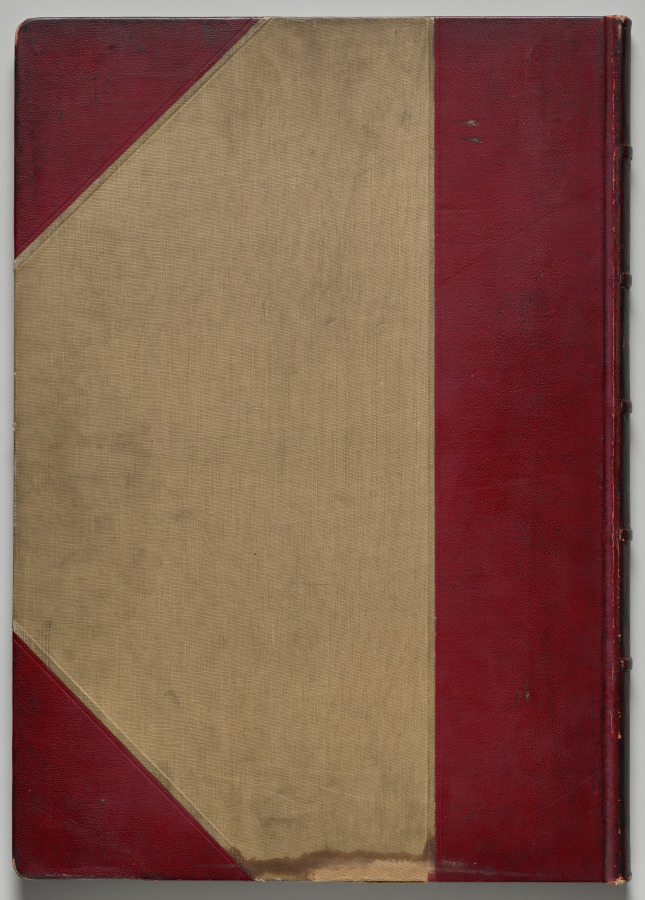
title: Architecture of the Middle Ages: Title Page - In Croyden Church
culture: England, 19th century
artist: Joseph Nash (British, 1808–1878)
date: 1838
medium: lithograph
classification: Print